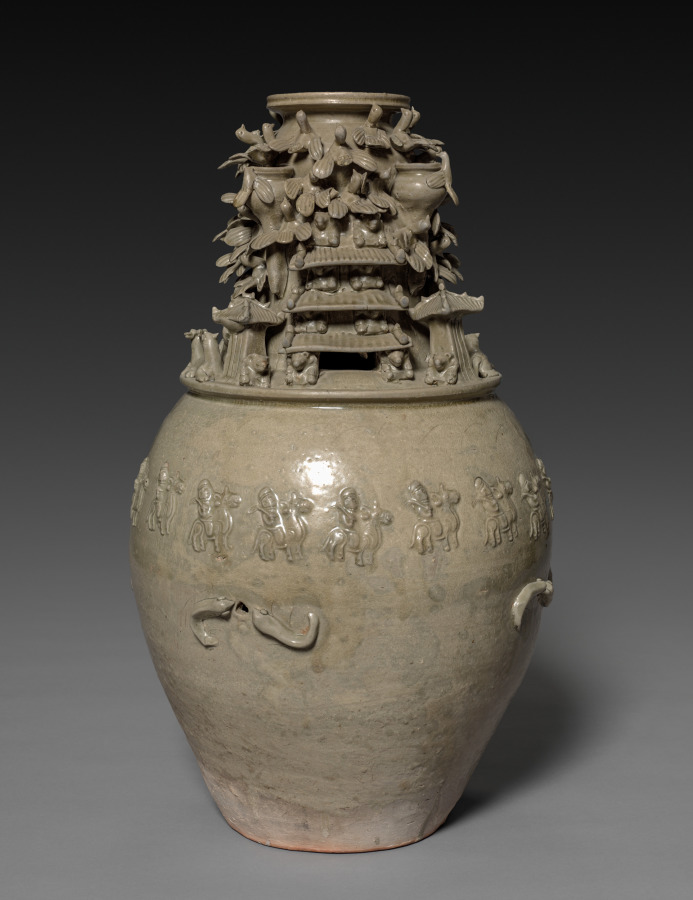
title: Funerary Urn (Hunping) with Figures, Pavilions, and Birds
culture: China, Western Jin dynasty (265-316 CE)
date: 265–316 CE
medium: glazed stoneware with molded and sculpted decoration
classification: Ceramic